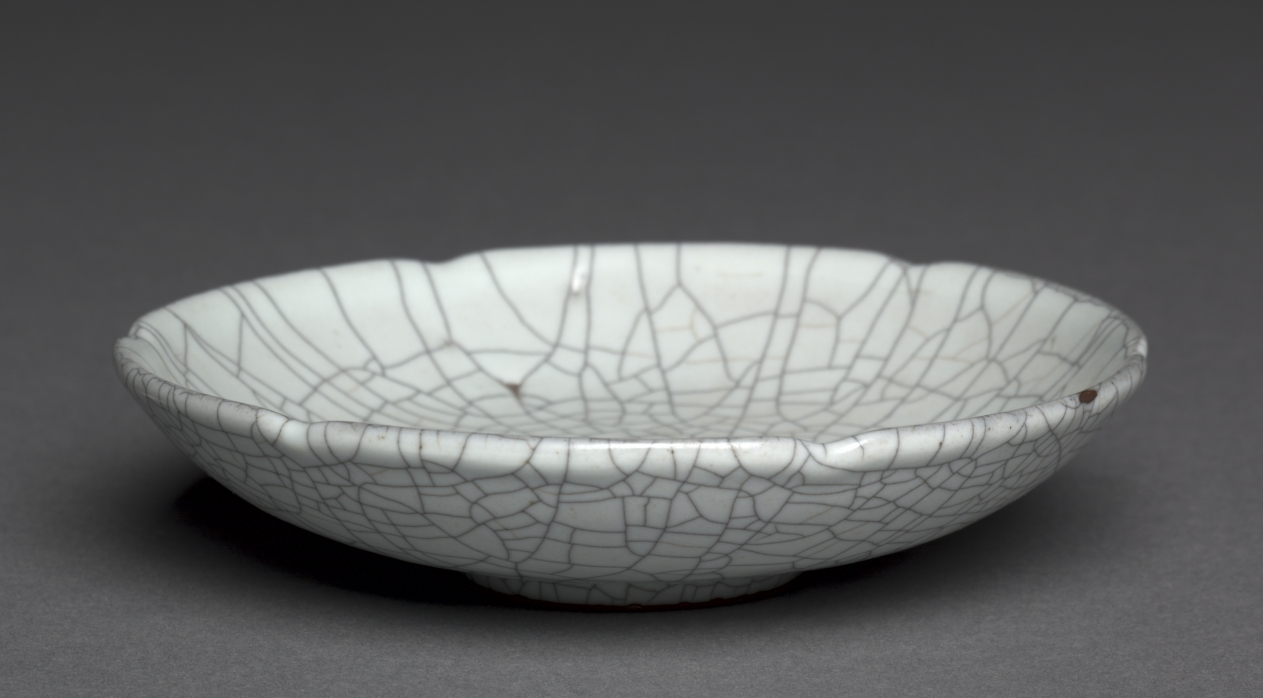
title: Flat Dish: Guan ware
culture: China, Song dynasty (960-1279)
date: 960–1279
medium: glazed reddish-brown stoneware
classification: Ceramic